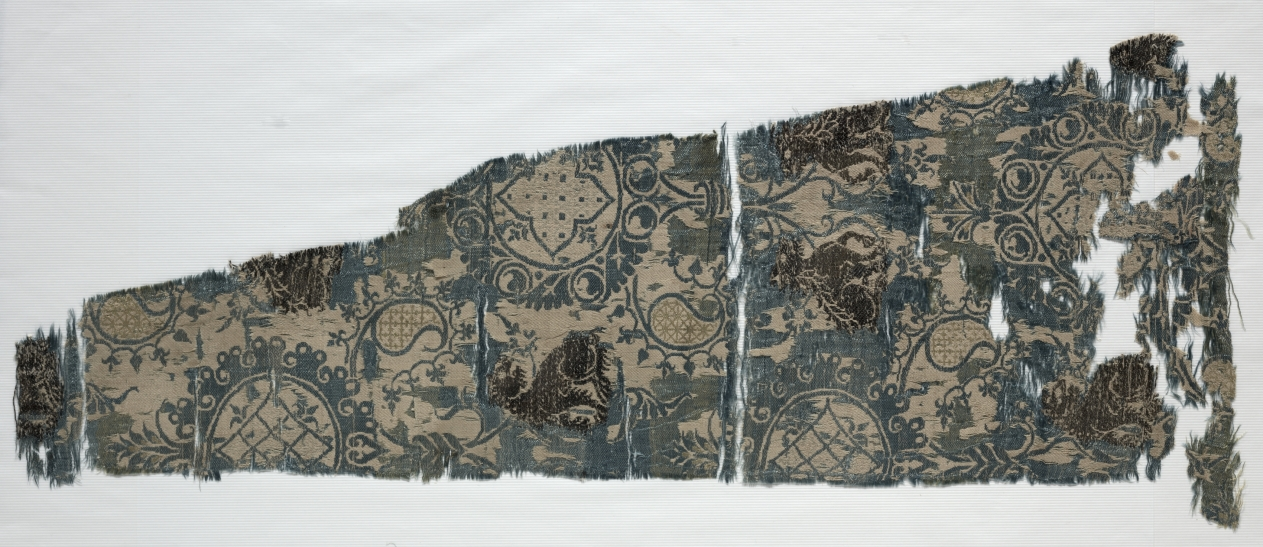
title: Silk Fragment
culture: Italy, last third of 14th century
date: 1360–1399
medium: lampas weave, brocaded; silk and Cyprian gold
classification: Textile